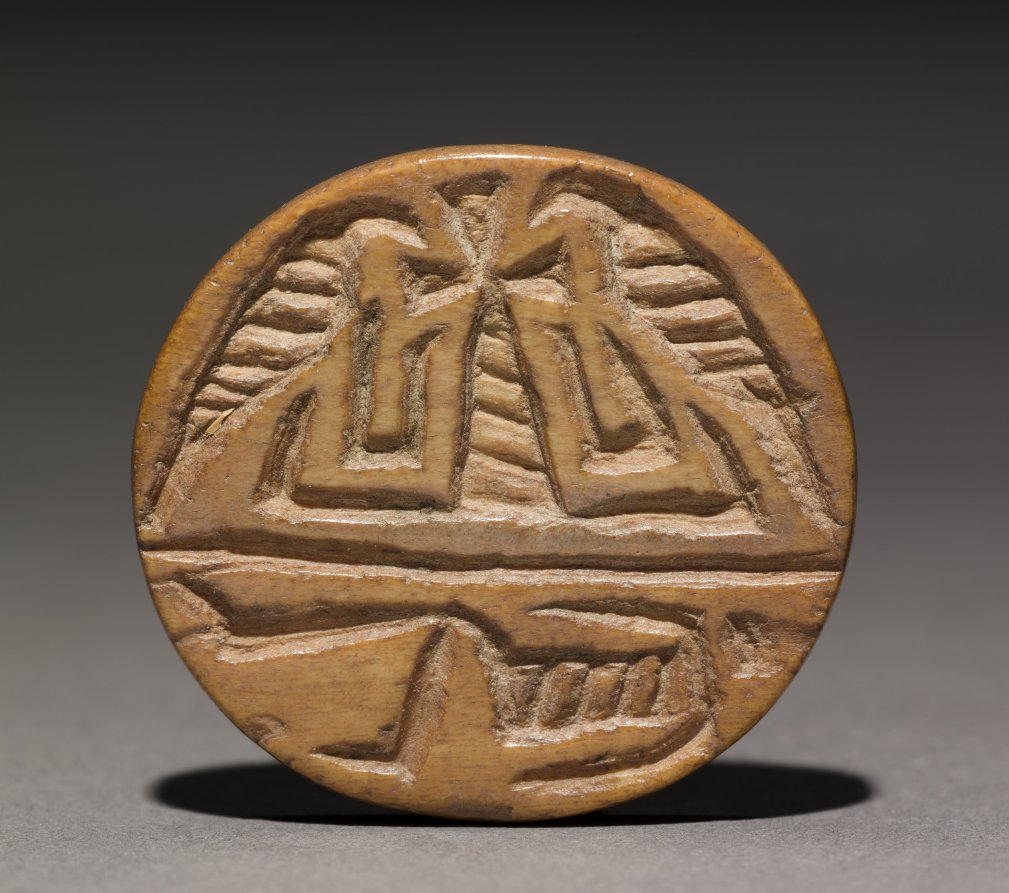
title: Seal Amulet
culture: Egypt, Old Kingdom (2647–2124 BCE), Dynasties 6–8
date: 2311–2124 BCE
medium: bone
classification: Amulets